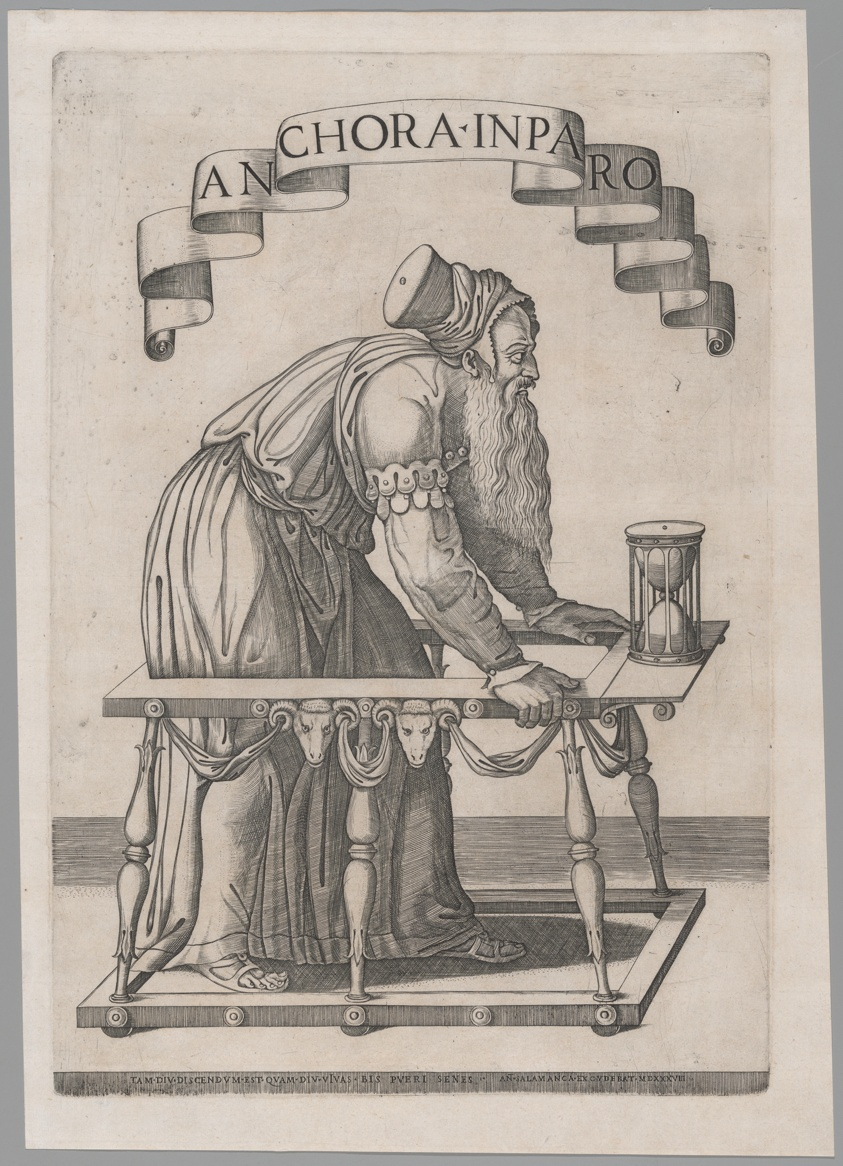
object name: Print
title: Anchora Inparo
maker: Attributed to Girolamo Faccioli (Italian, active by 1527/30–died 1574); after Domenico Giunti (Italian, 1505-1560)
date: 1538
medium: Engraving in black on ivory laid paper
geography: Italy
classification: prints and drawing; paper; engraving; print